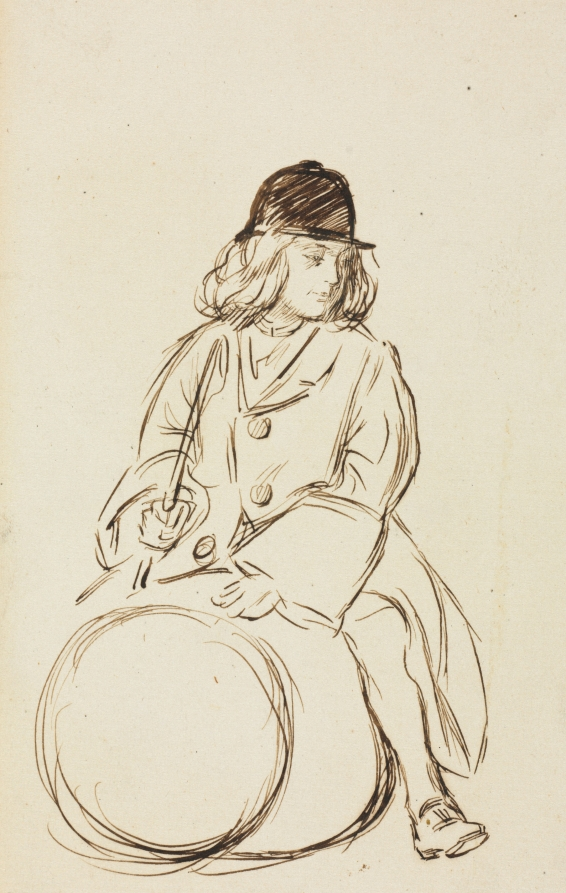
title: Portrait of Little Corbauld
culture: England, 19th century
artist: Charles Samuel Keene (British, 1823–1891)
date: c. 1842–91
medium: pen and ink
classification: Drawing